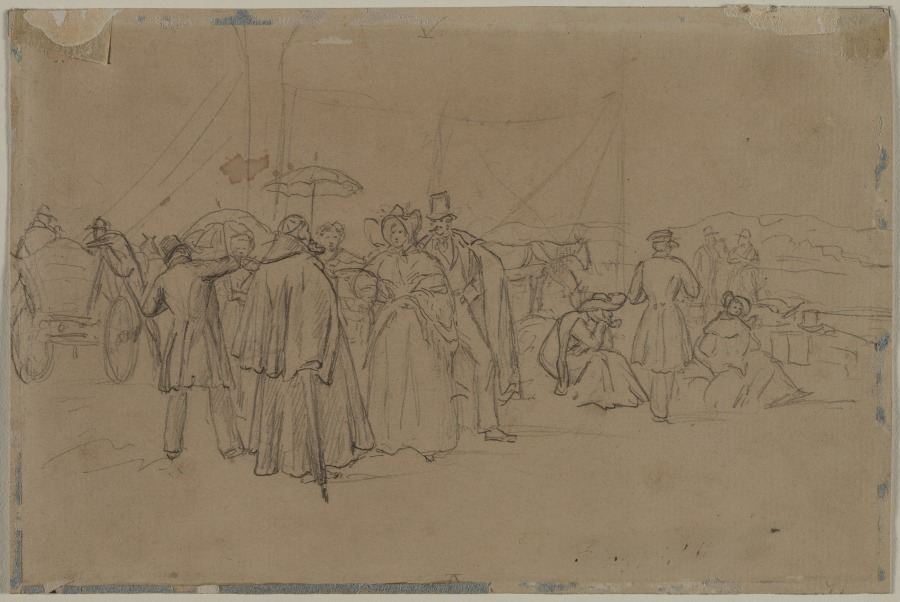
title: Passengers for Rhine Steamer (recto)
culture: Germany, 19th century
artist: Heinrich von Mayr (German, 1806–1871)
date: second or third quarter 1800s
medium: graphite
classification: Drawing